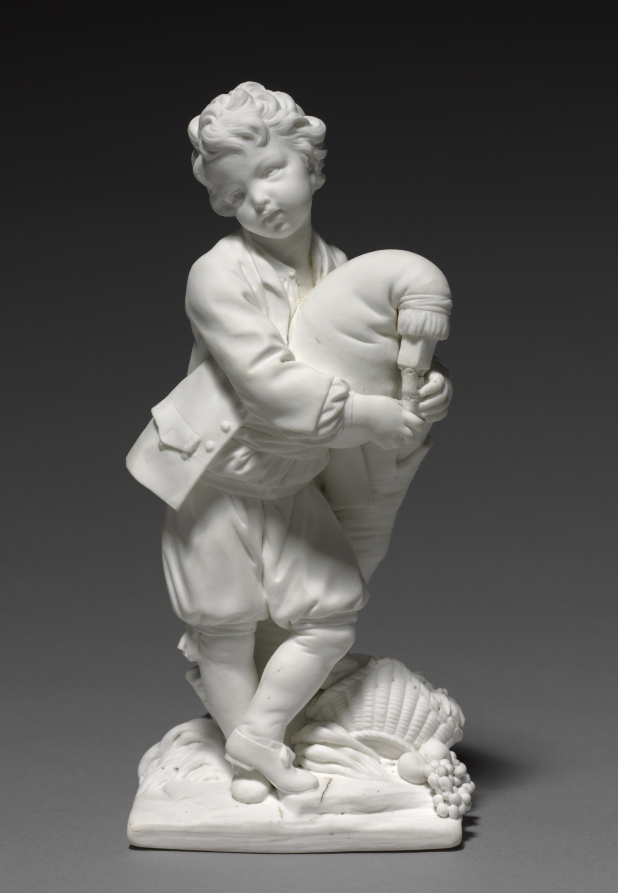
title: Figure of the Bagpiper (Le Joueur de musette)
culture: France, Vincennes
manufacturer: Vincennes Porcelain Factory (France, 1740–56)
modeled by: Pierre Blondeau (French)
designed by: François Boucher (French, 1703–1770)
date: 1748–52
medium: unglazed soft-paste porcelain (biscuit)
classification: Ceramic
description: Although a few Vincennes porcelain figures exist that are glazed, the royal factory adopted at an early date the practice of producing unglazed biscuit figures that, because of the purity of their material, resemble marble figurines. The fashion for biscuit figures first introduced at Vincennes quickly spread through Europe.